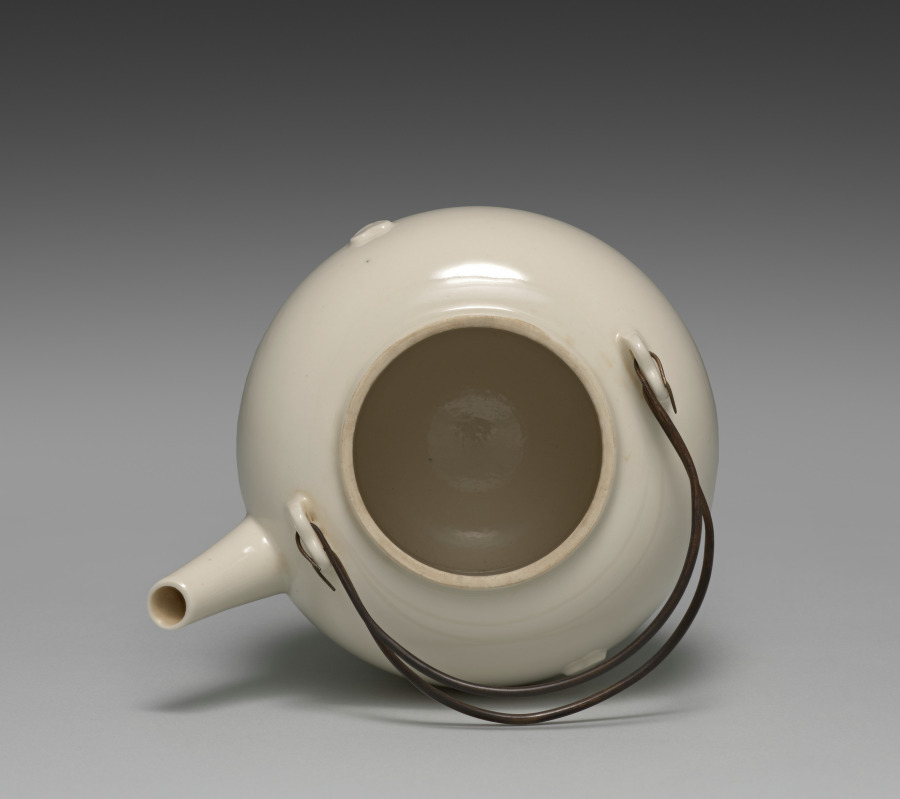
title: Teapot with Ruyi Motifs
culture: Japan, Meiji period (1868–1912)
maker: Seifū Yohei III (Japanese, 1851–1914)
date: 1893–1914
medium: Porcelain with molded design and iron handles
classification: Ceramic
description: The simple, round form of this teapot is embellished with only a pair of nyoi staff-head motifs, one on each side. Two arched iron handles, parallel to each other, are hooked through holes in raised tabs at the front and back of the shoulders of the pot. The round lid is depressed so that an iron ring handle fastened with an iron clamp passing through the lid can lie flat inside the recessed area. The box is not original to the piece and has an inscription dated to 1960. The person who wrote it clearly admired Yohei III and his efforts to produce works that resembled Chinese ceramics. The inscription describes Yohei’s journey to perfecting these copies but misidentified the Chinese kiln whose wares were the basis for this particular work.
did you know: The base of the pot has a “Seifu” seal.